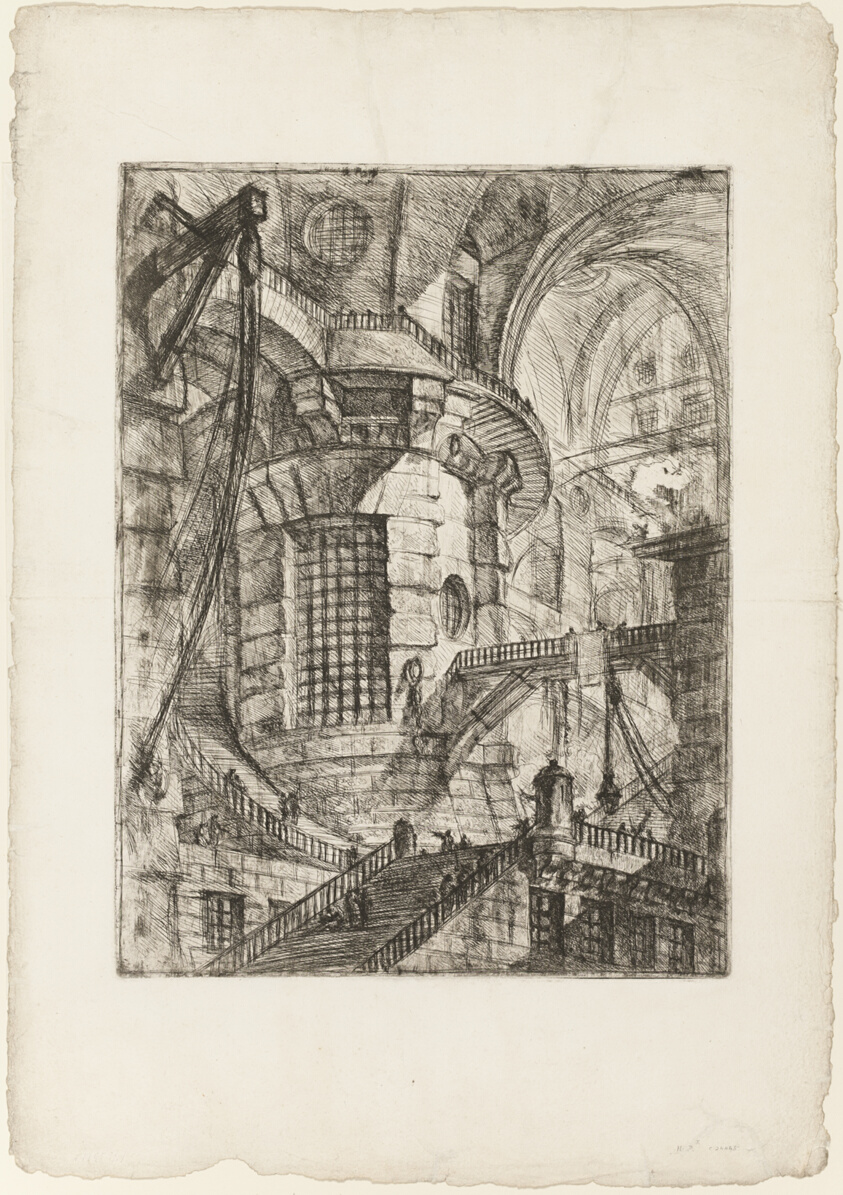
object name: Print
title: The Round Tower, plate 3 from Imaginary Prisons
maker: Giovanni Battista Piranesi (Italian, 1720-1778)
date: c. 1750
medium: Etching and engraving on heavy ivory laid paper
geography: Italy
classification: etching; print; prints and drawing